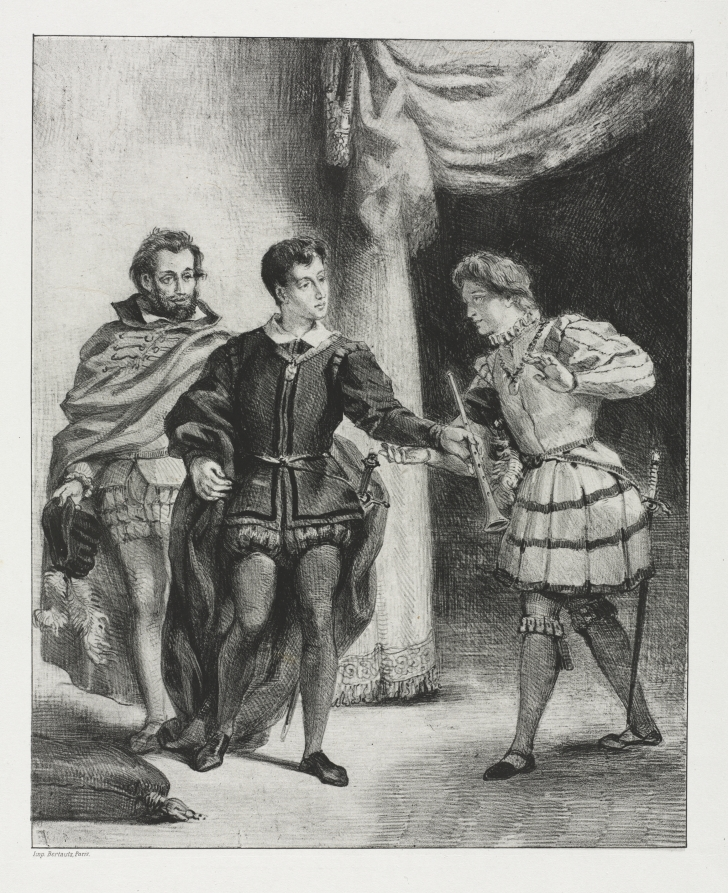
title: Hamlet: Hamlet and Guildenstern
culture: France, 19th century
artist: Eugène Delacroix (French, 1798–1863)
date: 1834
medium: lithograph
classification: Print